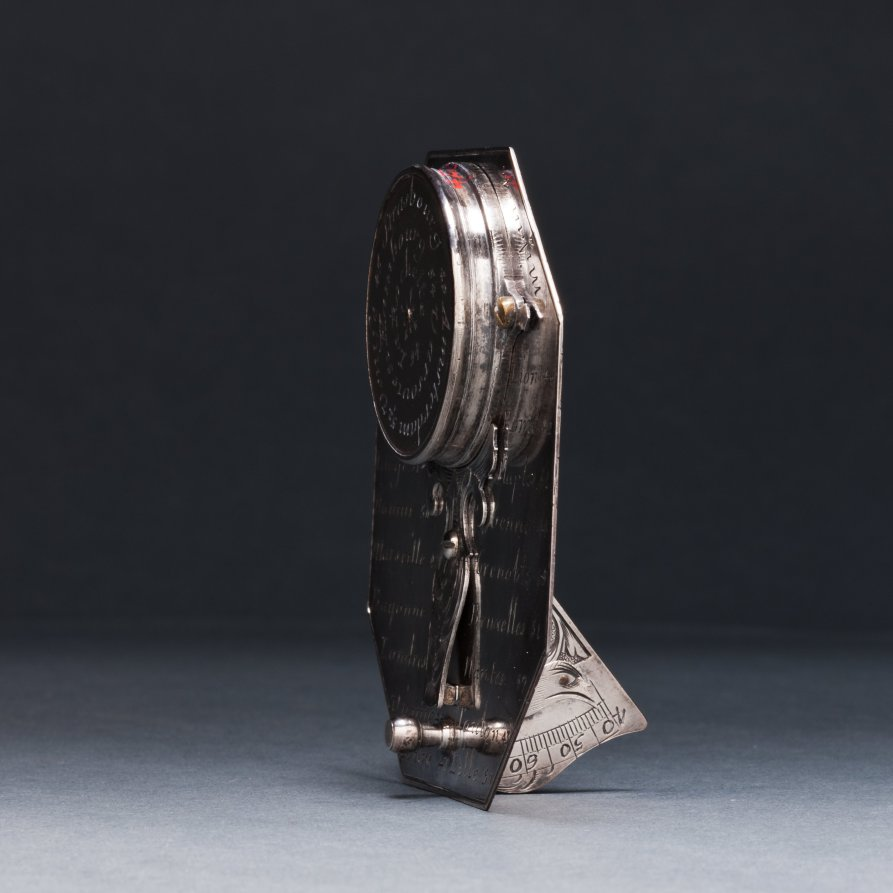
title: Butterfield Sundial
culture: France, 18th century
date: 1700s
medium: silver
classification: Silver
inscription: [Engraved signature above the compass in ribbon band]: "N. BION A Paris"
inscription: [Engraved on the face of the sundial]: “Pour 55° 4-5-6-7-8-9-10-11 50° IIII-V-VI-VII-VIII-IX-X-XI 45° 5-6-7-8-9-10-11 40° -VI-VII-VIII-IX-X-XI'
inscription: [Engraved on the other side]: "Pour 55° -8-7-6-5-4-3-2-1-0 50°-VIII-VII-VI-V-IIII-III-II-I 45°-8-7-6-5-4-3-2-1 40°-VII-VI-V-IIII-III-II-I"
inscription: [Engraved around the compass]: “NORD-OUEST-SUD-EST”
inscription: [Engraved on the back of the sundial]: “Turin 44 Milan 46 Paris 49 Lion 46 Metz 49 Rome 42 Liege 51 Naples 44 Namur 50 Gennes 44 Marseille 43 Grenoble 45 Bayonne 43 Bruxelle 51 Londres 52 Nantes 47 Vienne 48 Toulon 43 Tours 47 Lille 51”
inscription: [Engraved around the back of the compass]: “Venise 45 Strasbourg 49 Amsterdam 52 Hambourg 54 Varsovie 52 La Rochelle 46”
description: Butterfield-type sundials are characterized by their adjustable gnomons, metal flaps that cast a shadow on the dial’s face to indicate the hour, and geographical indices. This sundial has a scale adjustable between latitudes of 40° to 60° north. The latitudes of 26 European towns are engraved on its back for quick reference. With an intricately engraved silver face, it would have functioned as a fashionable traveler’s accessory.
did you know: Butterfield-style sundials were named after Micheal Butterfield, an English scientific and mathematical instrument maker who worked in Paris between 1674 and 1724.